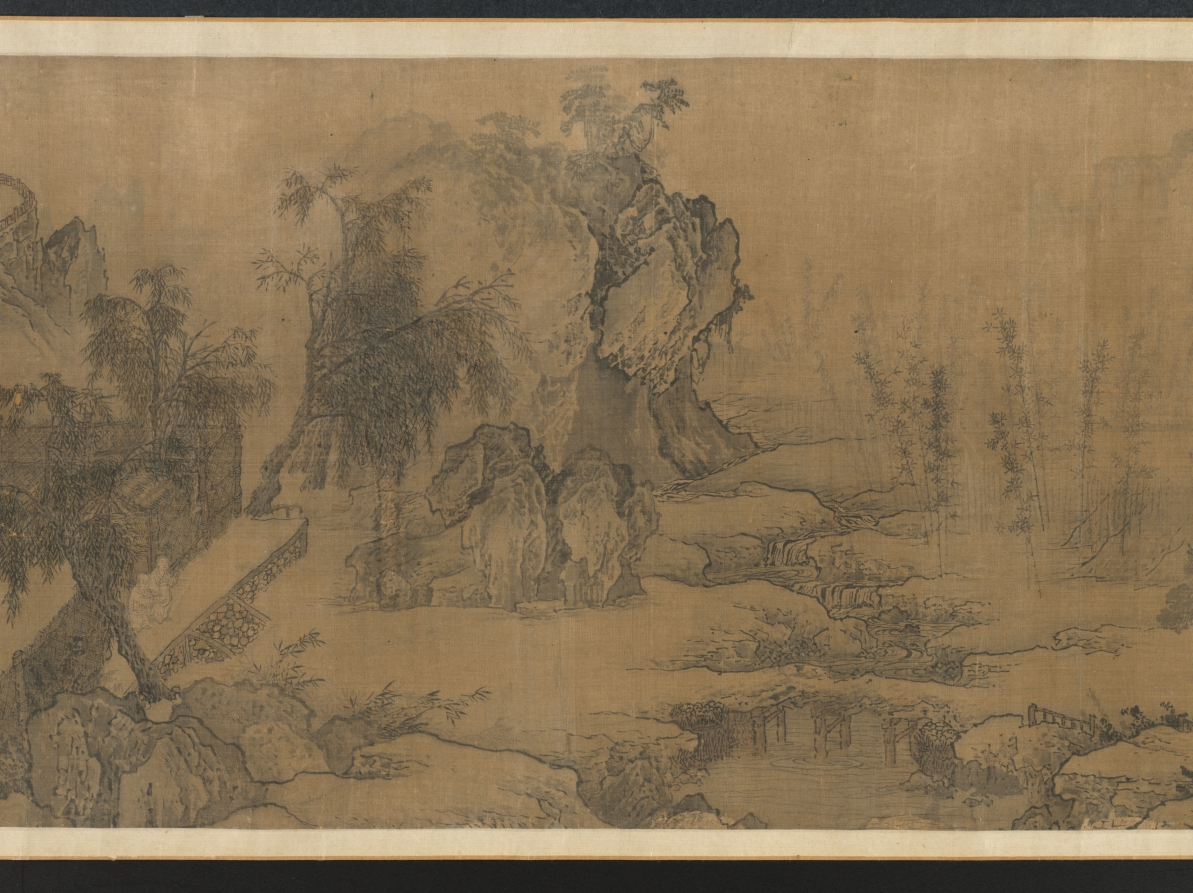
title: Tao Yuanming's Return Home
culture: China, Yuan dynasty (1271-1368)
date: 1300s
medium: Handscroll; ink and slight color on silk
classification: Painting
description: Tao Yuanming's revered poem "Return Home 歸去來辭 (Gui qu lai ci)" powerfully conveys his desire to leave bureaucratic life for the simplicity and authenticity of nature. This sentiment has deeply resonated with generations of Chinese scholars, making it a popular theme in paintings. This handscroll uses continuous narrative depicting Tao in multiple scenes from the poem. Starting on the right, the poet travels to his home. His children wait by the gate, while his wife pauses to tidy her hair before welcoming him. Then, free from the burdens of official service, Tao spends time in both nature and his cottage, where he can again enjoy wine, music, and books.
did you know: Poet Tao Yuanming 陶淵明 (c. 365–427 CE) returned to a secluded life instead of pursuing a civil service career.